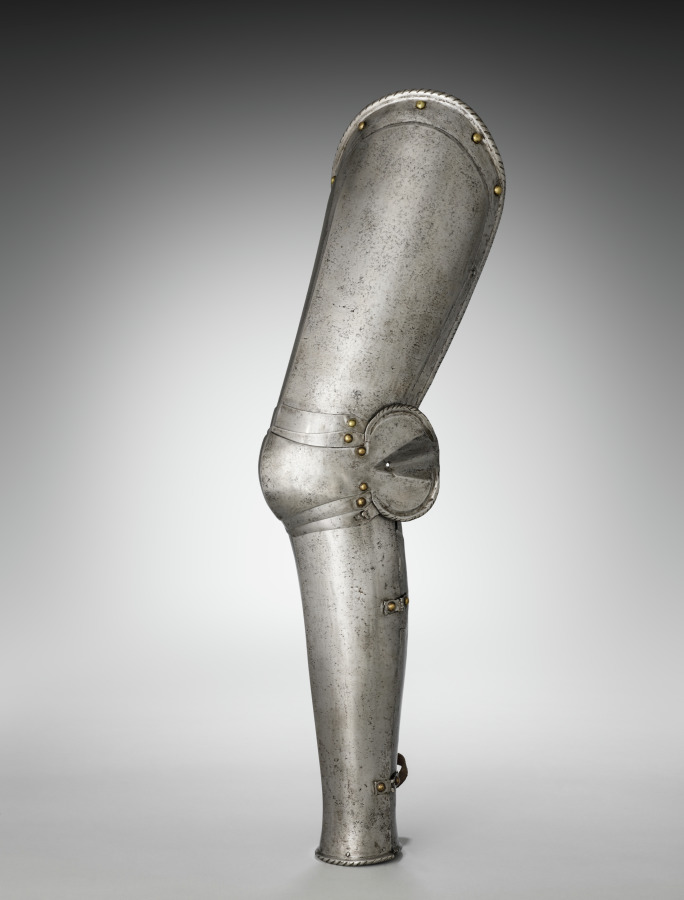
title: Proper Left Greave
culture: South Germany, 16th century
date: c. 1560–80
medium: steel, leather straps, brass rivets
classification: Arms and Armor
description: This armor was developed for the joust-a sporting combat between two mounted contestants. Although all of the elements of this armor date from the same period, they are not all from the same suit. This armor is thus called "composed." It also shows the asymmetry of jousting armor. The participants rode along a wall-like barrier known as a "tilt" with their left sides facing one another. Consequently, armor on that side of the body had to be thicker. Note the large plate (grandguard) over the left shoulder for extra protection. Also, the breathing holes in the helmet were placed on the right side (farthest from an opponent's lance) to avoid injuries from splinters. The bracket attached to the right breastplate is called the lance-rest, a shock-absorbing support designed to accommodate the lance when "couched" under the right armpit.